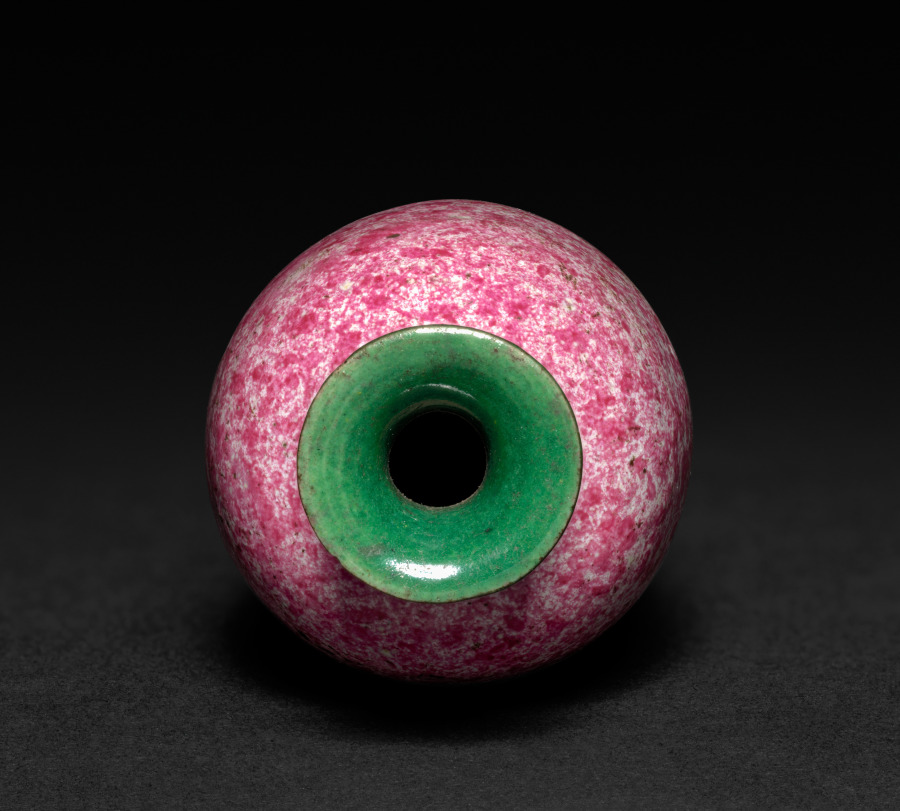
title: Miniature Vase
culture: China, Qing dynasty (1644–1911), Qianlong reign (1736–95)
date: 1736–95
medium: porcelain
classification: Ceramic